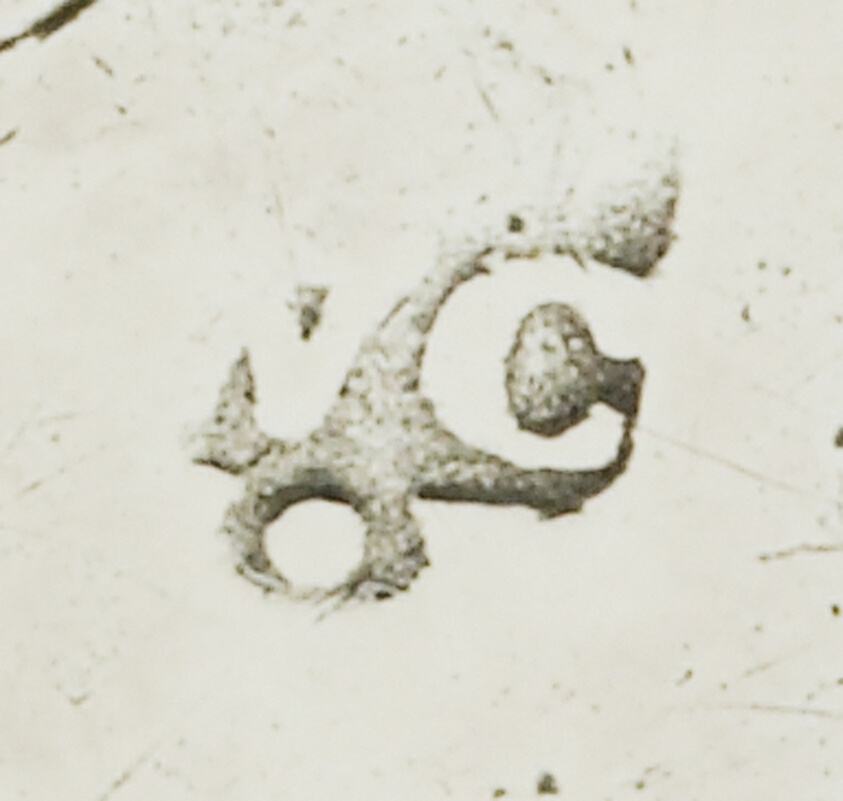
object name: Metalwork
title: Pepper Box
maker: William Cowell, Sr.; American, 1682/83–1736; Boston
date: c. 1720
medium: Silver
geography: Boston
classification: container; box; silver; american decorative arts; american arts; decorative arts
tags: dining, drinking